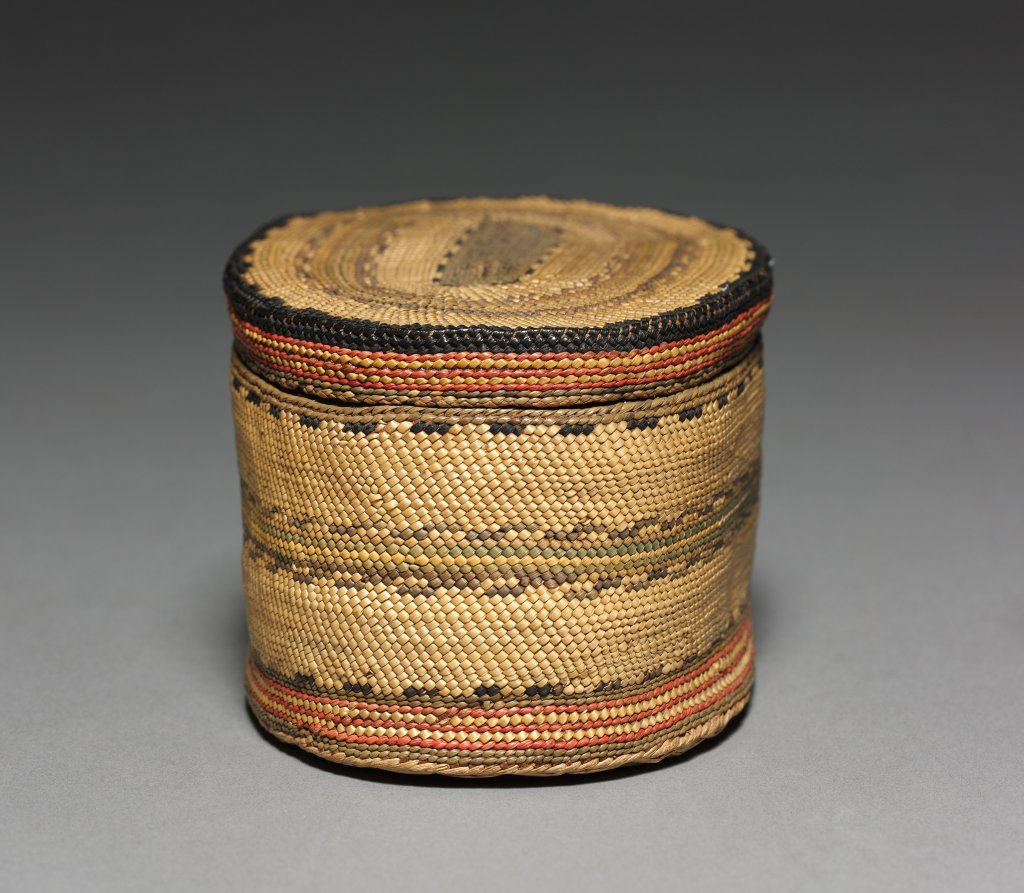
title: Lidded Bowl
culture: Northwest Coast, Vancouver Island, early 20th century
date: c 1900– 1925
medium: twined grass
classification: Basketry